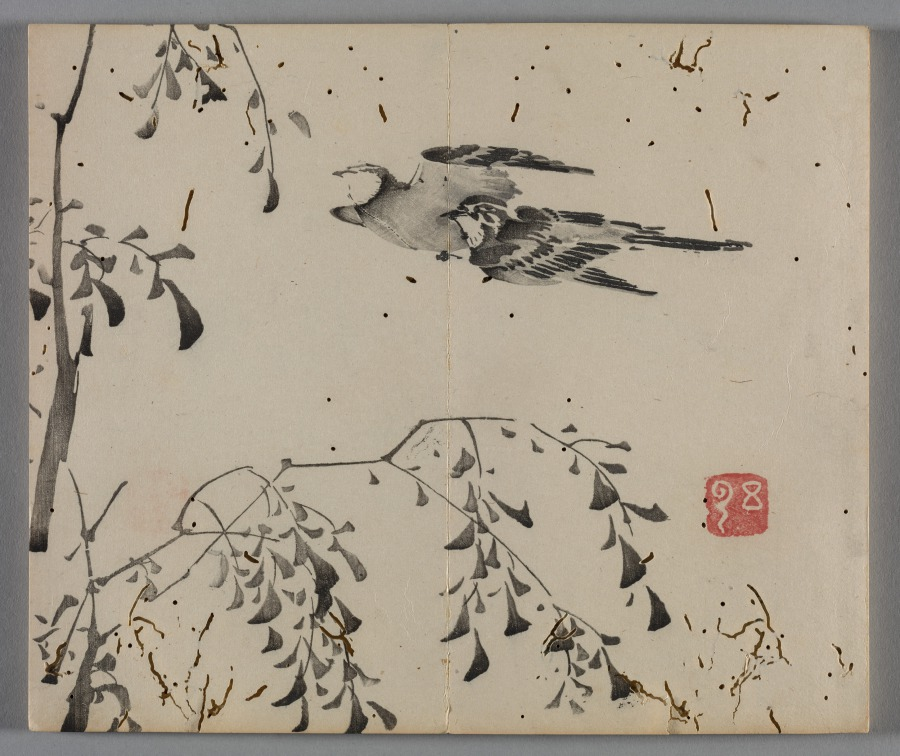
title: Ten Bamboo Studio Painting and Calligraphy Handbook (Shizhuzhai shuhua pu): Birds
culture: China, Qing dynasty (1644-1911)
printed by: Hu Zhengyan (Chinese, c. 1584–1674)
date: 1633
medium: Woodblock-printed book; ink and colors on paper; first edition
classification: Print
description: Color printing reached a level of perfection in the early 1600s, as seen in this Ten Bamboo Studio Collection of Calligraphy and Painting and the Mustard Seed Garden Manual of Painting (printed 1679 and 1701). The painterly quality, precision in registering (aligning) the woodblocks, and harmonious colors made them the most successful color print editions in Chinese history. Both editions were printed and compiled in Nanjing, spread nationwide, and had a great impact on the arts in Japan and Korea.